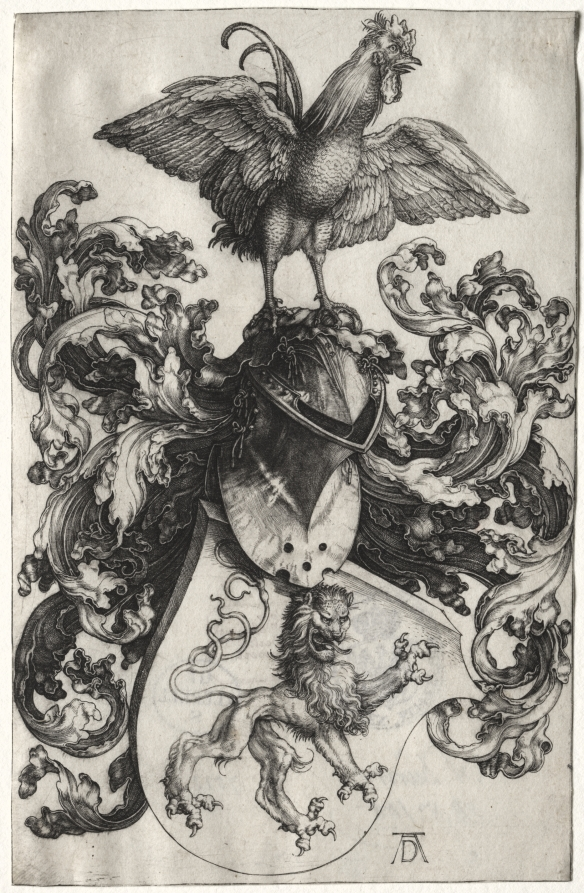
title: The Coat of Arms with a Lion and Cock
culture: Germany, late 15th-early 16th Century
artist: Albrecht Dürer (German, 1471–1528)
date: probably 1503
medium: engraving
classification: Print